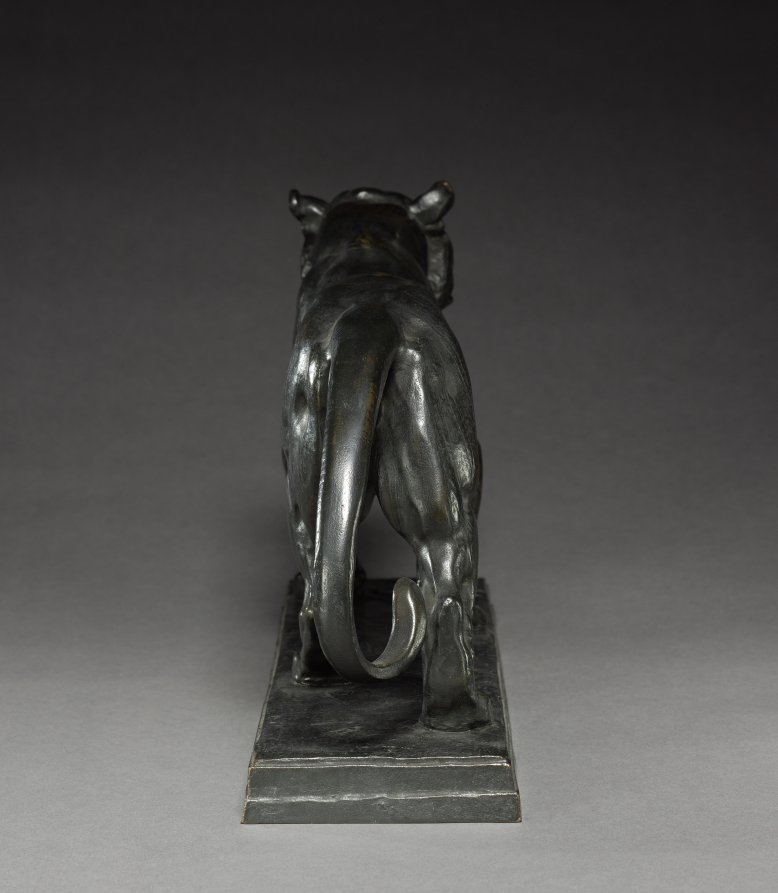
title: Walking Tiger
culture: France, 19th century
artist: Antoine-Louis Barye (French, 1796–1875)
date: c. 1836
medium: bronze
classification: Sculpture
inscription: Signed on base: "Barye"